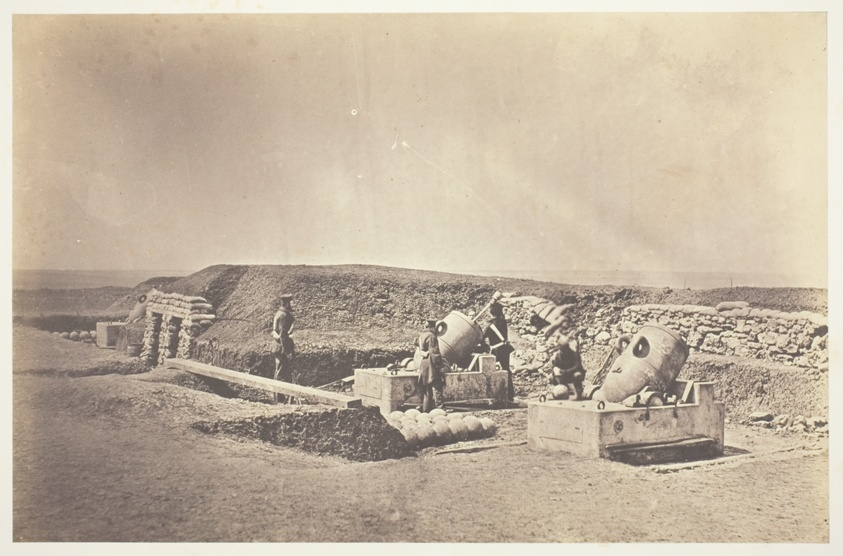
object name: Photograph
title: Mortar Batteries in front of Picquet House, Light Division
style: 19th century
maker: Roger Fenton (English, 1819–1869)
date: 1855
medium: Salted paper print, from the album "Photographic Pictures of the Seat of War in the Crimea" (1856)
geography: England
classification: salted paper print; photographic process; photography; photograph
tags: Collected by Hugh Edwards